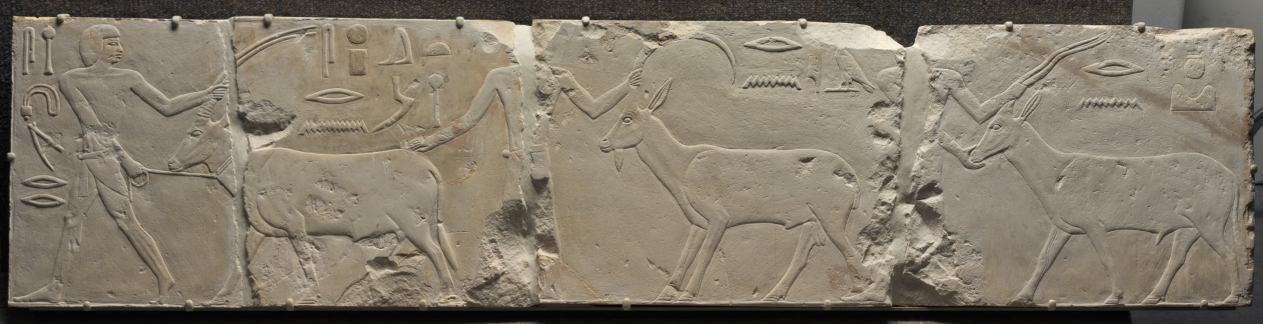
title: Relief of Men Bringing Desert Animals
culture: Egypt, Saqqara, Old Kingdom (2647–2124 BCE), Dynasty 6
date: c. 2311–2281 BCE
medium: limestone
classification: Sculpture